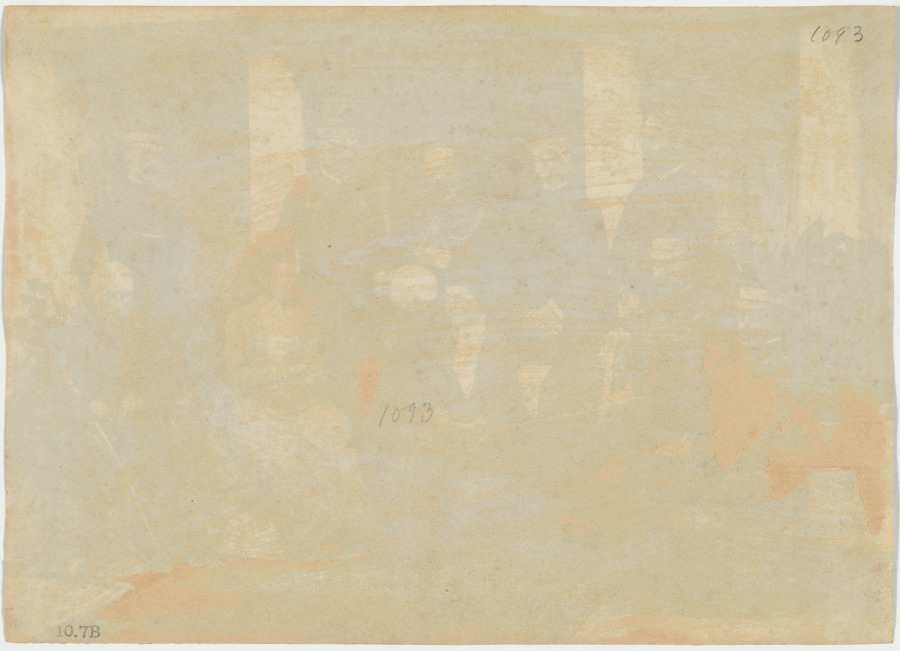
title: The Duke and Duchess of Connaught, with Col. Adam, Captain H.V. Benett, Col. Becher, Gen. Knowles, Captain Herbert, Col. Cavaye, Mrs. Cavaye, and Gen. R. Gellispie, Mhow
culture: India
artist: Raja Deen Dayal (Indian, 1844–1905)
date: 1887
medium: albumen print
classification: Photograph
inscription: Stamped in black ink on verso: “10.7B” Written in pencil on verso: “1093” Written in pencil on verso: “1093”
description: This gathering of British military officers was occasioned by the visit of Queen Victoria’s seventh child, Prince Arthur, Duke of Connaught and Strathearn (1850–1942) (seated, second from left). His wife, Princess Louise Margaret of Prussia, is the woman on the right. As commander in chief of the Bombay Presidency from 1886 to 1890, the prince performed military inspections and embarked on diplomatic missions throughout India. Dignitaries’ visits were routinely commemorated with a professional photograph. The photographer often took the image for free, counting on the purchase of prints by those wanting to feature the dignitary in their parlors on walls and tables or in albums.